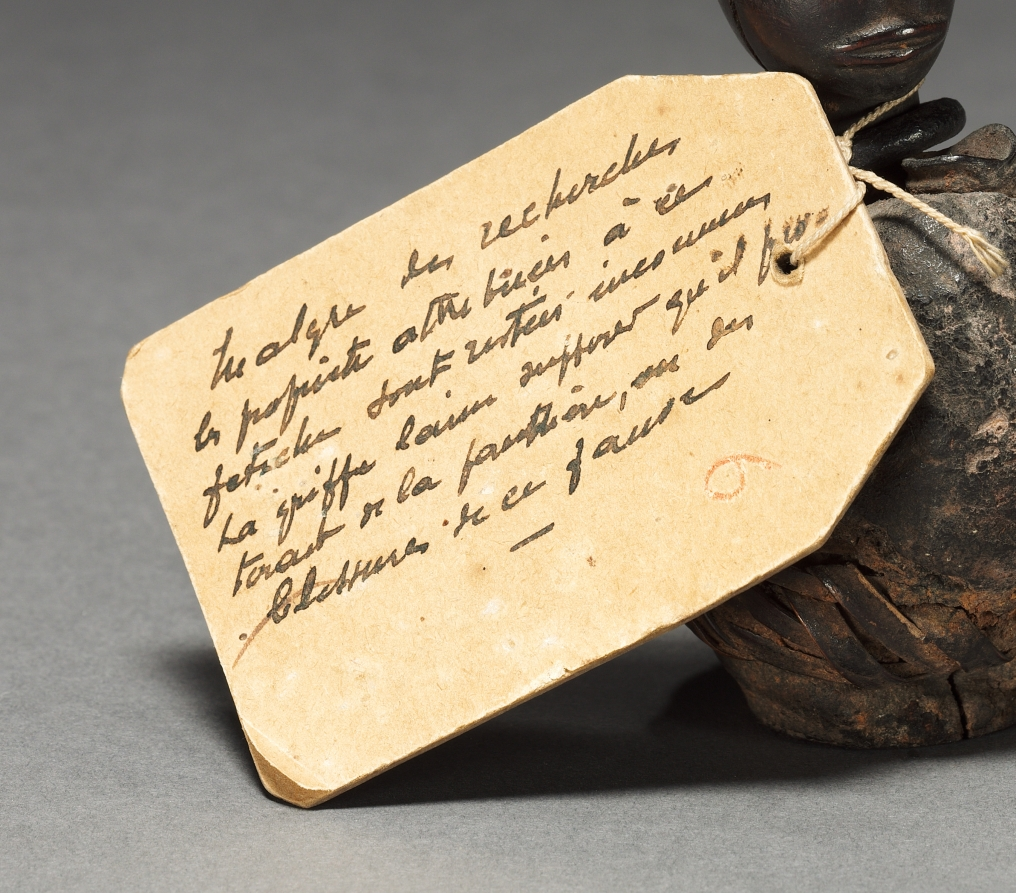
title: Power figure (nkisi)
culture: Central Africa, Republic of the Congo, Kongo people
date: late 1800s-early 1900s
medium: Wood, organic materials (including resin), iron, reed, tooth, seashell or glass beads, and possibly plastic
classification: Sculpture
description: One of seven anthropomorphic figurines, these minkisi contained medicines in which an ancestral spirit was believed to reside. Minkisi were objects of communal use; if conflict arose between two citizens, the Nkisi figure, along with the nganga (ritual leader) helped resolve the dispute. This small figure belonged to “the sorcerer of Loango,” chief of all sorcerers of that region (a province and port in West Central Africa).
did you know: This small figure belonged to “the sorcerer of Loango,” chief of all sorcerers of that region (a province and port in West Central Africa).